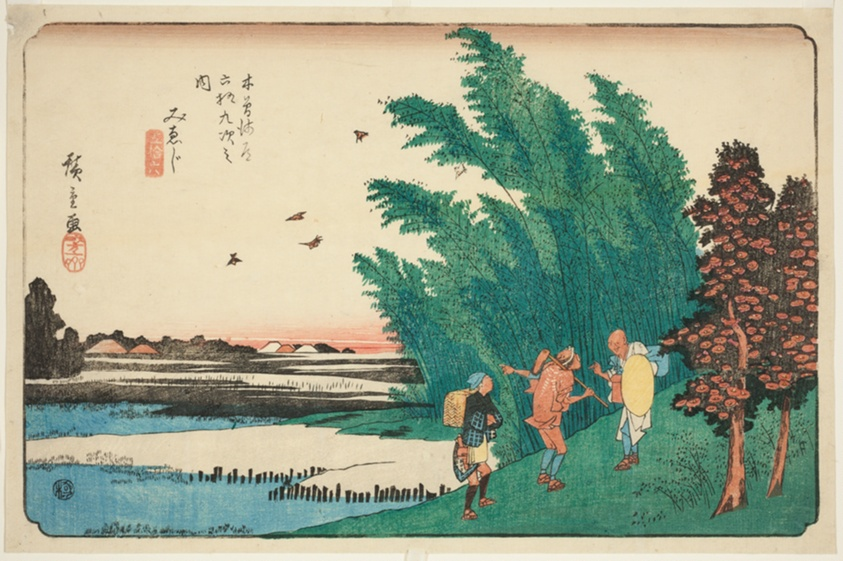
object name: Print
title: No. 56: Mieji, from the series "Sixty-nine Stations of the Kisokaido (Kisokaido rokujukyu tsugi no uchi)"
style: Japanese (culture or style)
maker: Utagawa Hiroshige 歌川 広重; Japanese, 1797-1858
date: c. 1835/38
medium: Color woodblock print; oban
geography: Japan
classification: woodblock print; print; asian art